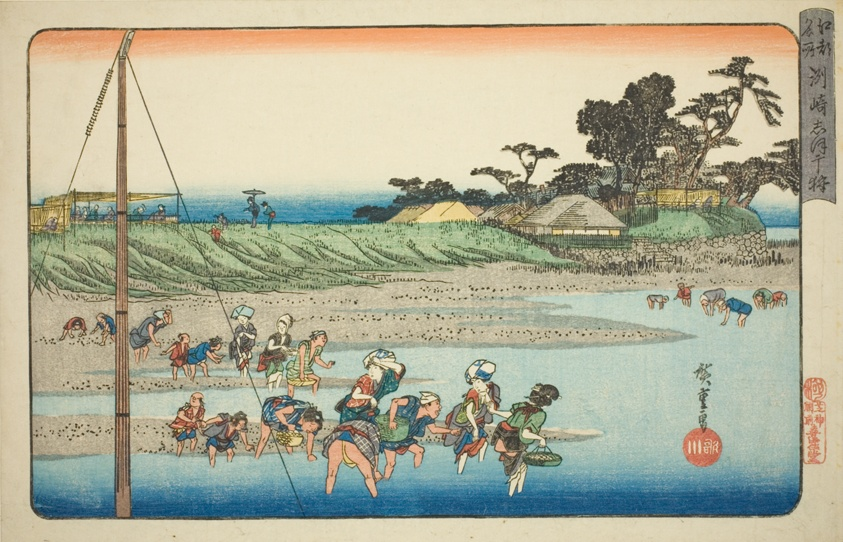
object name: Print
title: Gathering Shellfish at Low Tide at Susaki (Susaki shiohigari), from the series "Famous Places in Edo (Koto meisho)"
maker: Utagawa Hiroshige 歌川 広重; Japanese, 1797-1858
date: c. 1832/34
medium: Color woodblock print; oban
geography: Japan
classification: woodblock print; print; asian art